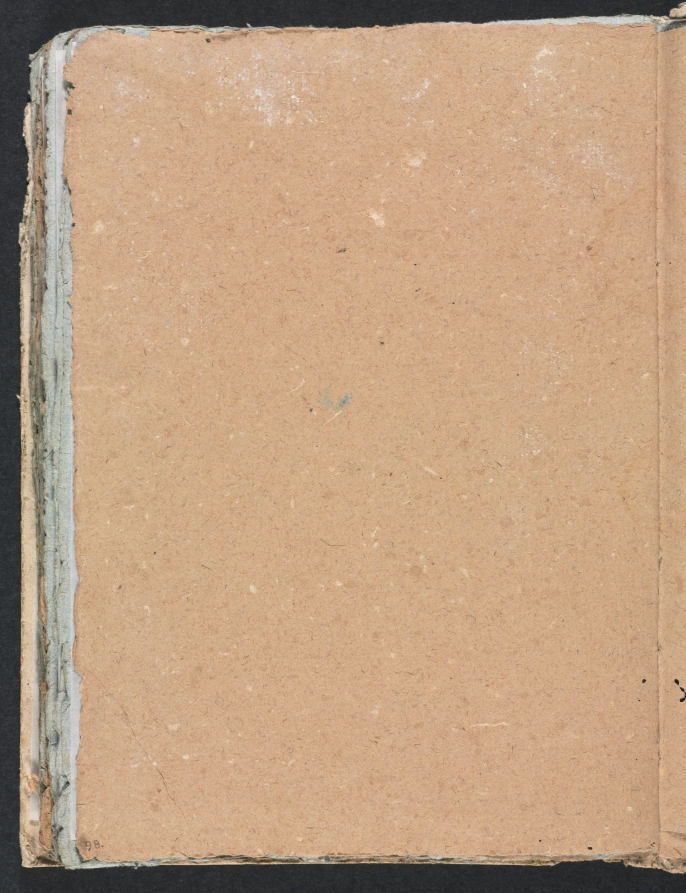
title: Verona Sketchbook: (page 98)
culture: Italy, 18th century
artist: Francesco Lorenzi (Italian, 1723–1787)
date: 1760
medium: paper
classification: Bound Volume